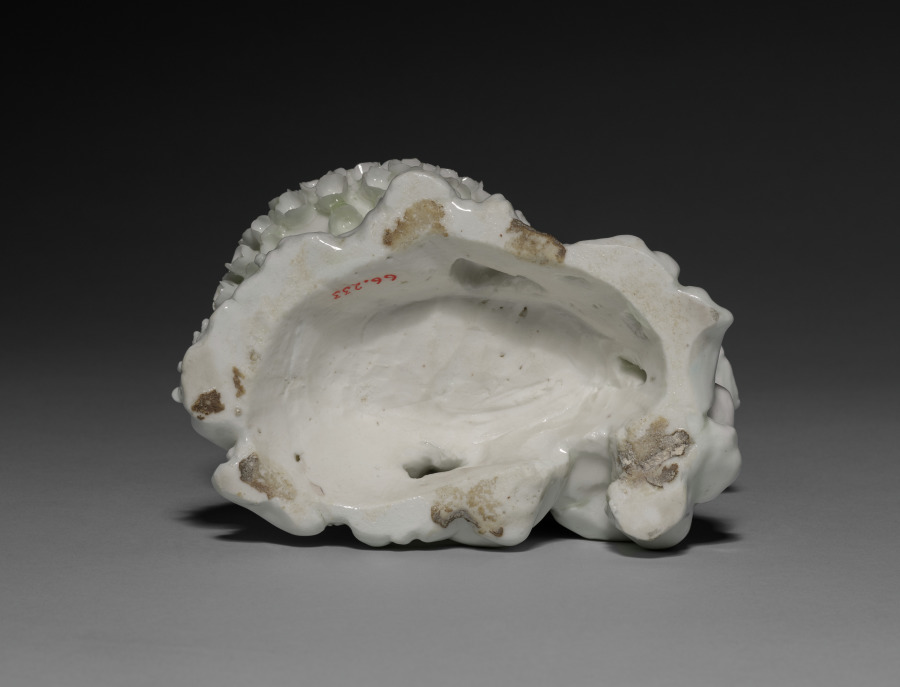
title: Potpourri Vase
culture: France, Vincennes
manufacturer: Vincennes Porcelain Factory (France, 1740–56)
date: c. 1750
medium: soft-paste porcelain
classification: Ceramic